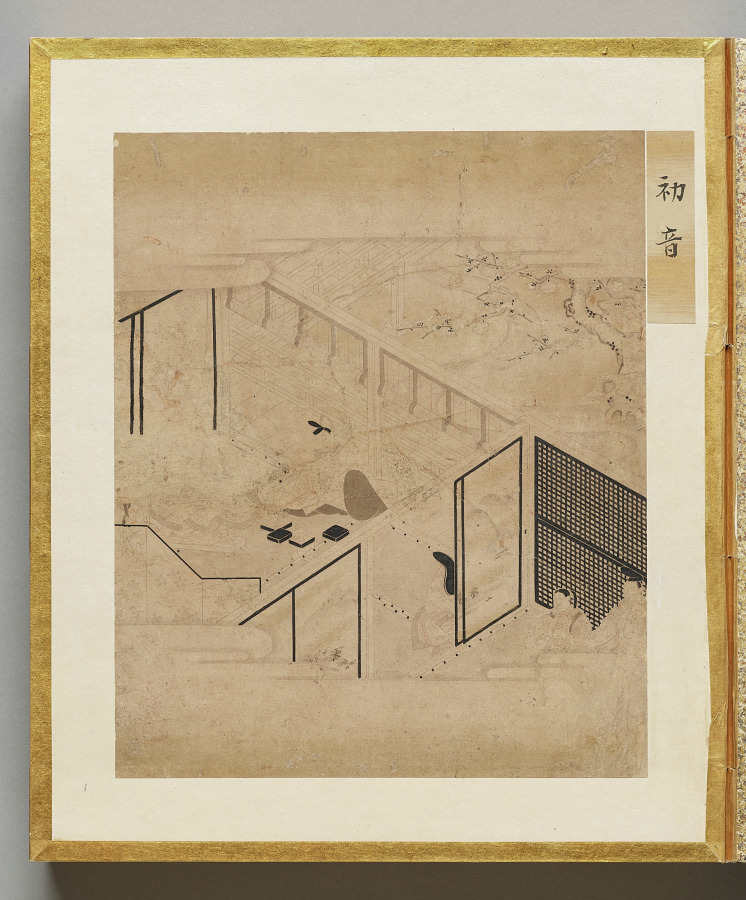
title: First Warbler from Album of Illustrations for the Tale of Genji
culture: Japan, Edo period (1615–1868)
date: 1600s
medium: painting in an accordion-style album; ink, light color, and gold on paper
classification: Bound Volume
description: This album contains illustrations for the classic literary work the Tale of Genji, authored in the 1000s by Murasaki Shikibu, an aristocrat of the Heian period (794–1185) court. The scenes are painted in the “white drawing” (hakubyō) mode, in which a fine ink line is used to depict figures and spaces with great subtlety, punctuated only occasionally by traces of red pigment for a character’s lips, a detail of a garment, or a decorative element. These two scenes illustrate episodes from the chapters “Thin Veil of Cloud” (Usugumo) and “Barrier Gate” (Sekiya).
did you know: The illustrations are identified by chapter title in cartouches to the upper right of the paintings.